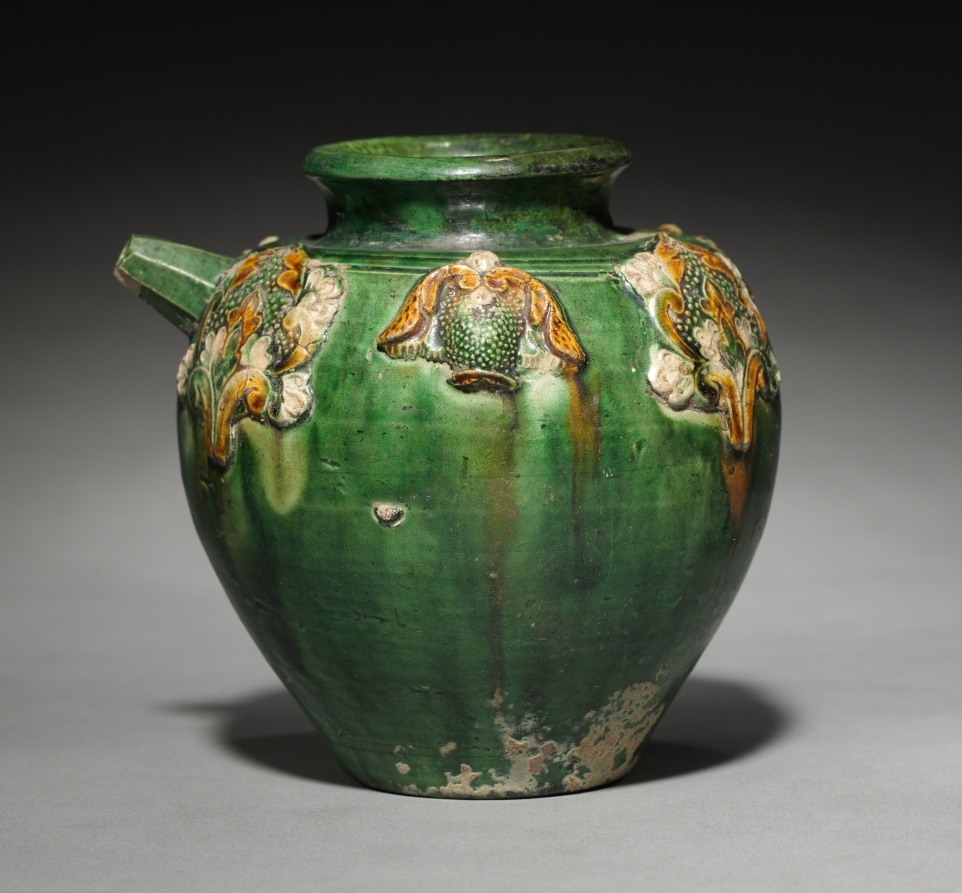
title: Jar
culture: China, Tang dynasty (618-907)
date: late 600s–700s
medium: pottery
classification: Ceramic